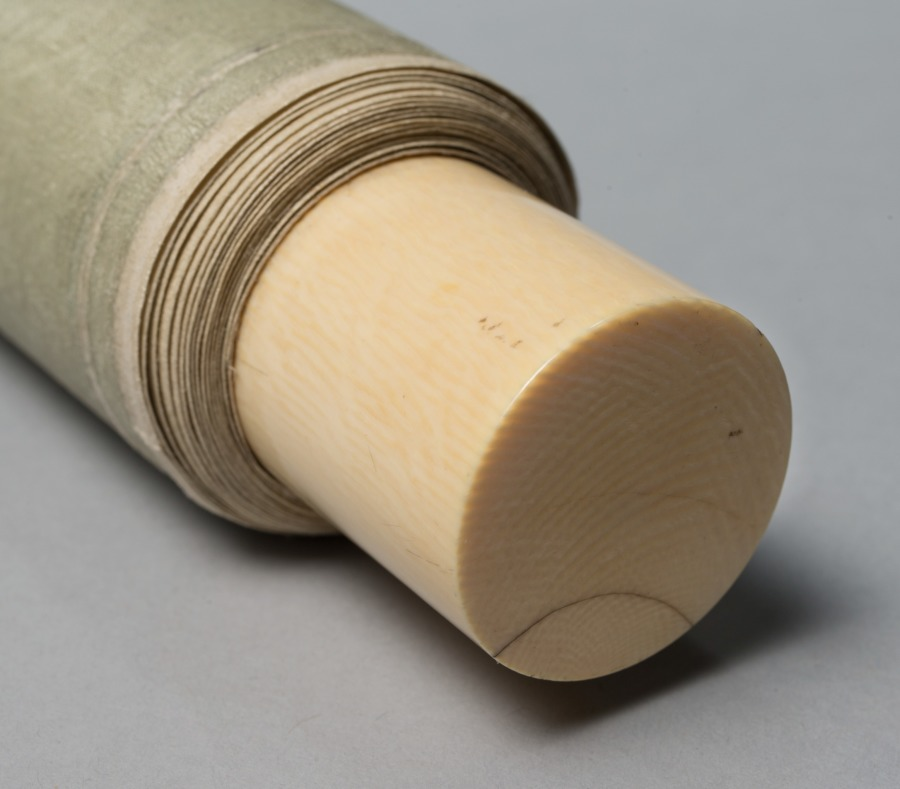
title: Solitary Colors of the Autumn Woods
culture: China, Ming dynasty (1368–1644)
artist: Wang Jianzhang (Chinese, active 1621–1662)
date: first half 1600s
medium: hanging scroll; ink and color on satin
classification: Painting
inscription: Artist's inscription, signature, and 2 seals: Cold frost falls on the fences,/ Solitary colors scatter the maples./ Reciting the chapter of "The Autumn Water,"/ I cannot still the emotion in my old heart. After the style of Fan Hua-yüan [Fan Kuan], Wang Chien-chang . [seals] Wang shih chih yin; Chien-chang. trans. LYSL/HK/WKH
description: Two gentlemen stand outside a thatched hut in a dense forest; some trees have bare branches indicating that the season is early autumn. Wang Jianzhang’s inscribed poem refers to a chapter called “Autumn Water” from Zhuangzi, a famous Daoist text written in the 3rd century BC: "Cold frost falls on the fences, / Solitary colors scatter the maples. / Reciting the chapter of “The Autumn Water,” / I cannot still the emotion in my old heart." Wang Jianzhang lived through the collapse of the Ming dynasty (1368–1644) and the rise of the Qing dynasty (1644–1911), when China was governed by the Manchus, an ethnic people from Manchuria who were traditionally viewed as “barbarians” by the Chinese. The poetic reference to Zhuangzi’s “Autumn Water” seems to discreetly convey Wang’s feelings about his country being taken over. “Autumn Water” was about learning to take steps in the foreign way, but not acquiring a foreign tongue. Perhaps Wang was lamenting his conflicted situation. For survival he had to adapt to the new political and social climate, while still trying to maintain his own identity and Chinese traditions.